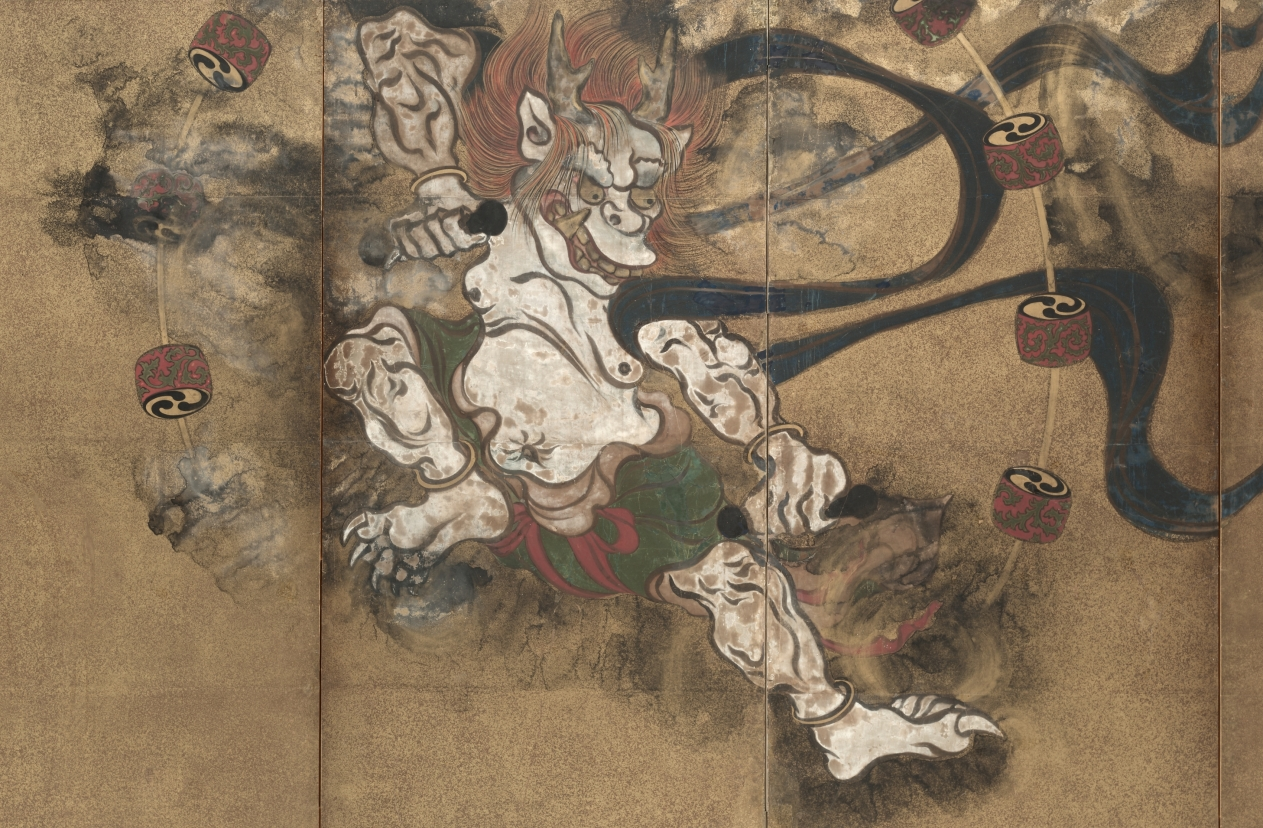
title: God of Thunder (Raijin)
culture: Japan, Edo period (1615–1868)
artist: studio of Tawaraya Sōtatsu (Japanese, c. 1570–c. 1640)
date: mid-1600s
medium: six-panel folding screen; ink, color, and gold on paper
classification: Painting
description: Such depictions of the God of Thunder originated in Buddhist art. Here, the image was painted on paper covered with gold dust, a technique often found in paintings by Tawaraya Sotatsu or of the Sotatsu school. This gold technique and the "Inen" seal here suggest that the anonymous painter of this screen was probably associated with the Sotatsu workshop. The artist used a prototype borrowed from earlier Japanese narrative painting—rather than mechanically reproducing Sotatsu’s image—and created a bold, innovative image that served the world of play and leisure in early Edo Japan. The theme of "God of Thunder" was often paired with "God of Wind" and has been frequently reinterpreted by generations of Rimpa artists. Unfortunately, the screen God of Wind which would have accompanied this God of Thunder cannot be located.